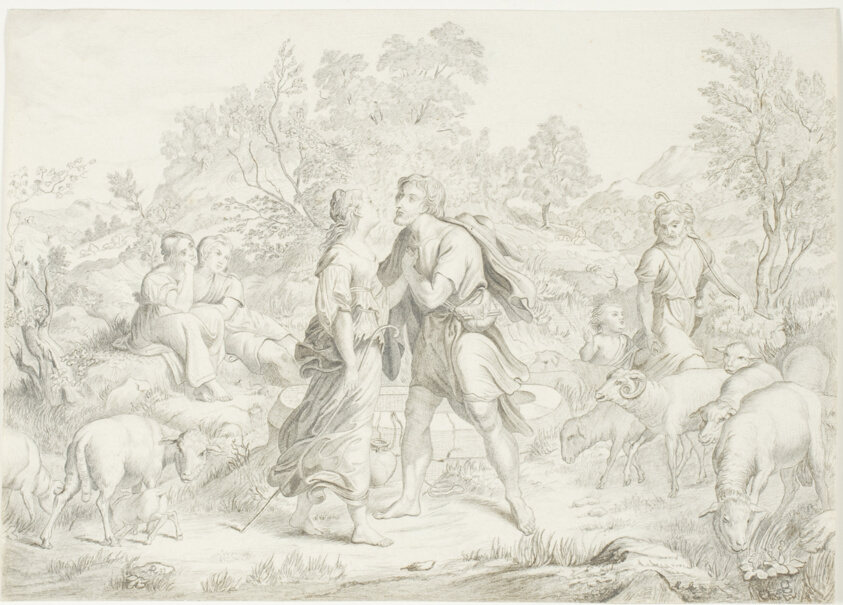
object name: Drawing and Watercolor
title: Jacob and Rachel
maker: August Richter (German, 1801-1873)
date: 1832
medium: Graphite with stumping, and additions in pen and brush and brown ink, on ivory laid paper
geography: Germany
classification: graphite; prints and drawing; paper